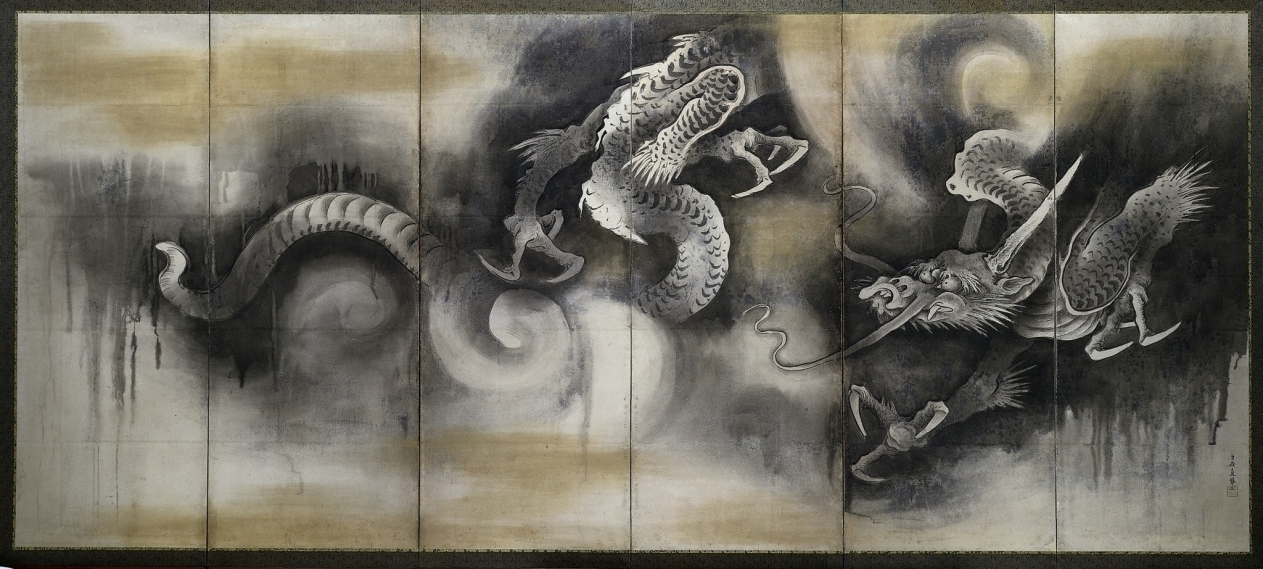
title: Dragon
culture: Japan, Edo period (1615–1868)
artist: attributed to Soga Nichokuan (Japanese)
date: early to mid-1600s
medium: six-panel folding screen; ink, slight color, gold, and silver on paper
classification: Painting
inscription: Signed: Soga Chokuan II (Soga Chokuan ni). Sealed: Hoin (right), Soga Chokuan Hoin (three seals at left) Edo period (1615-1868)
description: A dragon dives through clouds on this screen, while on the other screen, a tiger looks upon a waterfall as it prowls out of a bamboo grove. Tiger and dragon are traditional symbols of the balancing forces in the world, yin (the feminine aspect) and yang (the masculine aspect). This painting has a signature and seals, identifying it as a work by Soga Nichokuan, a painter thought to be from Sakai (near Osaka), and known primarily for his representations of hawk-eagles (kumataka).